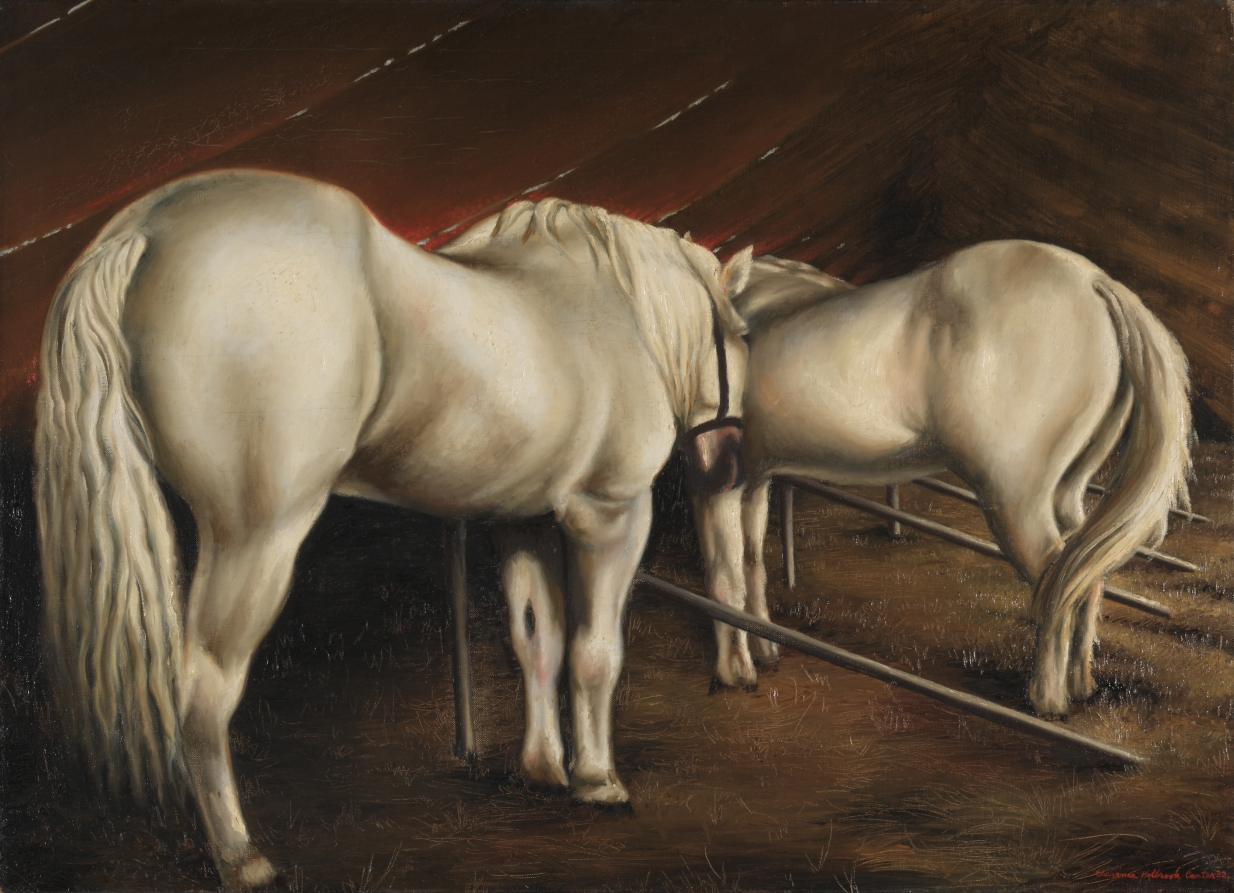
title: Circus Horses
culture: America, Ohio, Cleveland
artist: Clarence Holbrook Carter (American, 1904–2000)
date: 1933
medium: oil on canvas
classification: Painting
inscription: signed lower right: Clarence Holbrook Carter 33